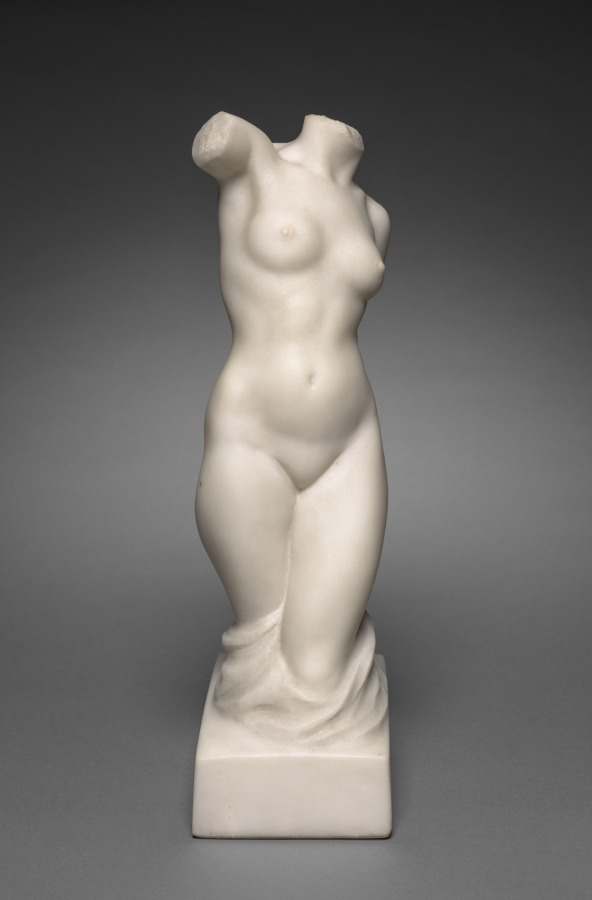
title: Torso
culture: America, Ohio, Cleveland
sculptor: Max Kalish (American, born Russian Empire [now Lithuania], 1891–1945)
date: 1924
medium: marble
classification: Sculpture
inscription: Signed on right side near side of base.: "M. Kalish 24"